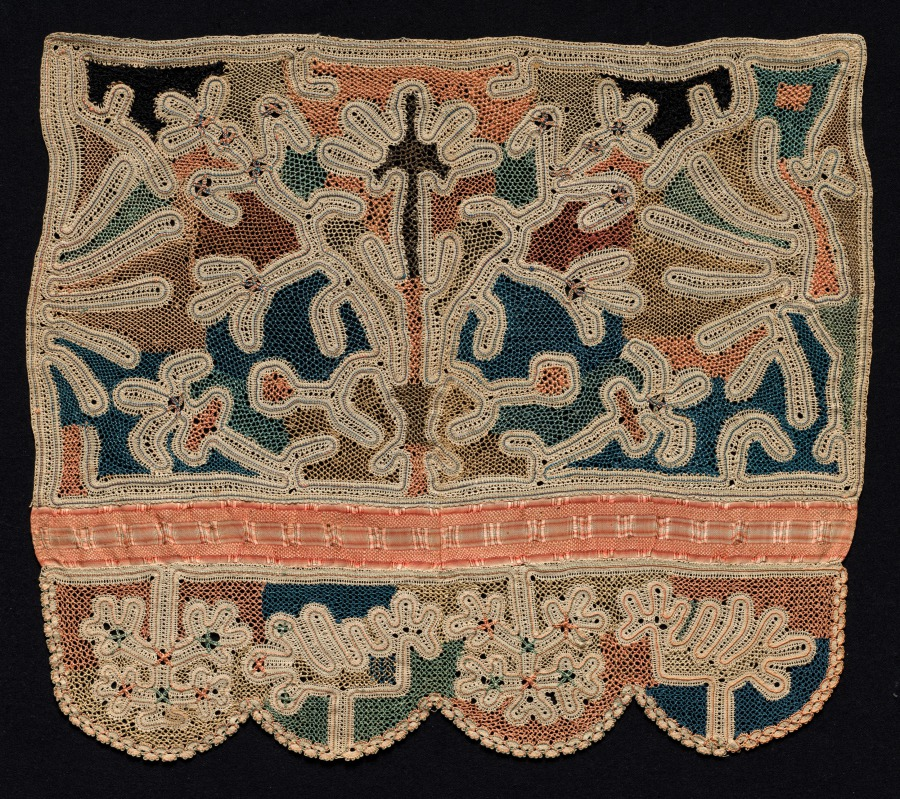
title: Lace Towel End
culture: Russia, Kostroma province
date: c. 1700s–1800s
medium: cotton or linen (est.); straight (continuous) bobbin lace (Vologda tape lace). The tape forms figural or plant motifs outlined with colored gimp (heavy cord) with a polychrome plaited ground linking the tape; applied silk (est.) ribbon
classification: Lace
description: This Russian lace panel was likely used to embellish the end of a bathing towel. Textiles of this type are valuable for their fine lace making including ancient folk motifs, ritual significance, exemplification of the role of textiles in their society, and in this case, connection to a prominent woman collector, Natalia de Shabelsky, without whom this textile and others like it might have been lost.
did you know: Embellishing the ends of everyday towels was a common folk tradition in many cultures because it displayed the skill of the mother or daughter who made this lace.